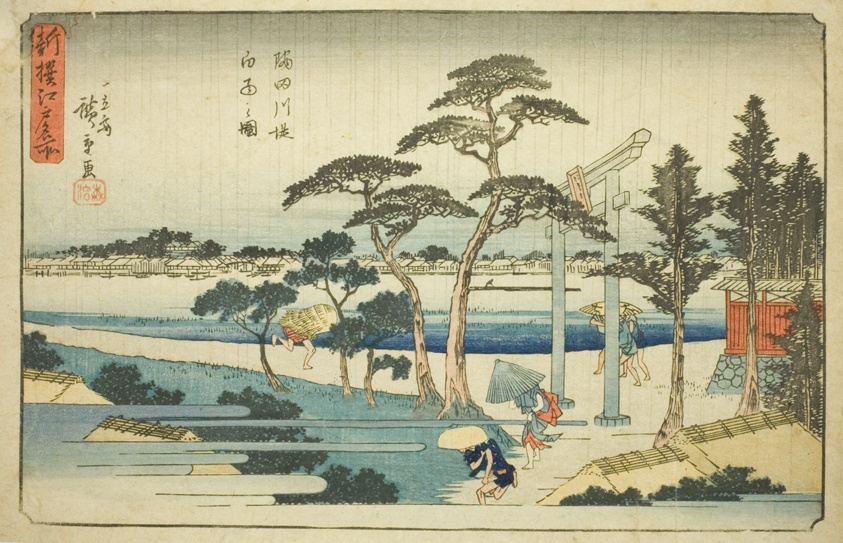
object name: Print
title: Shower at the Sumida River Embankment (Sumidagawa zutsumi hakuu no zu), from the series "Newly Selected Famous Places in Edo (Shinsen Edo meisho)"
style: Japanese (culture or style)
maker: Utagawa Hiroshige 歌川 広重; Japanese, 1797-1858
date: c. 1839/42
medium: Color woodblock print; oban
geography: Japan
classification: woodblock print; print; asian art